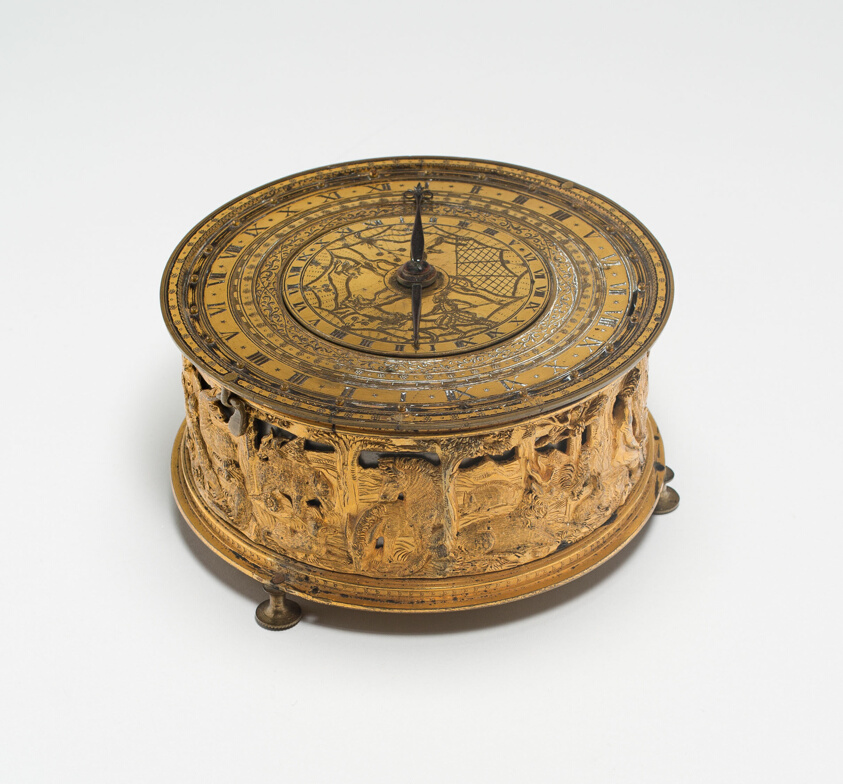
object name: Metalwork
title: Table Clock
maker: Augsburg, Germany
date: c. 1575/1625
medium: Gilt bronze and iron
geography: Germany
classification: clock; furniture; european decorative arts; metalwork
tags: furniture